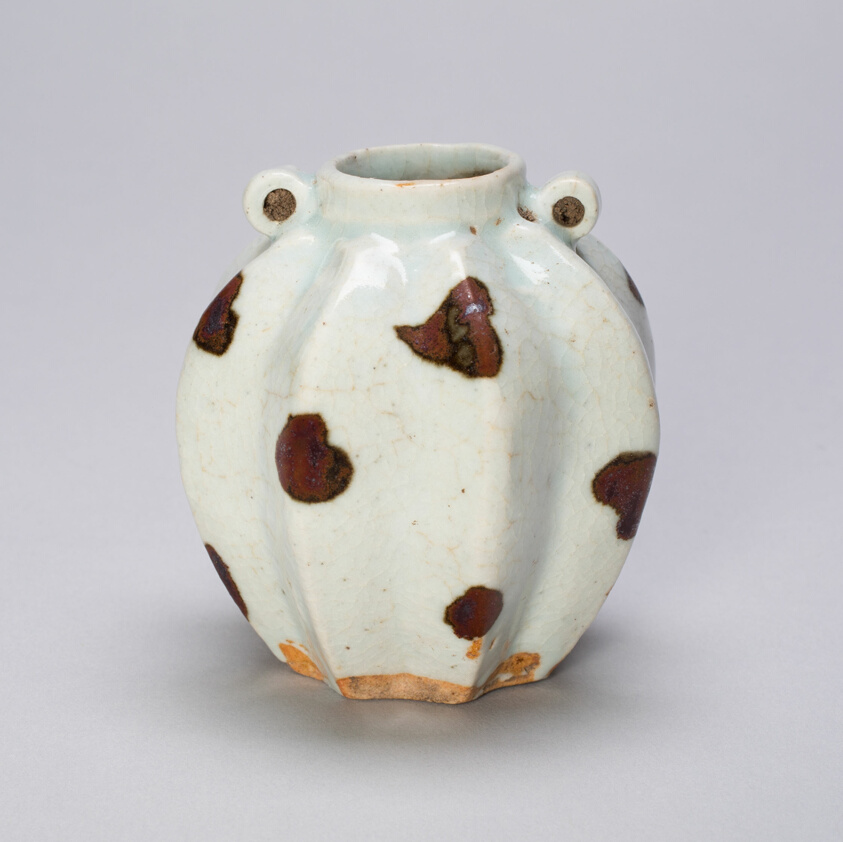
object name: Vessel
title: Lobed Jar in Form of Balambing (Philippine Island Star Fruit)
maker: China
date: Yuan dynasty (1279–1368), first half of 14th century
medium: Qingbai ware; glazed porcelain with iron spots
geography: China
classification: ceramics; vessel